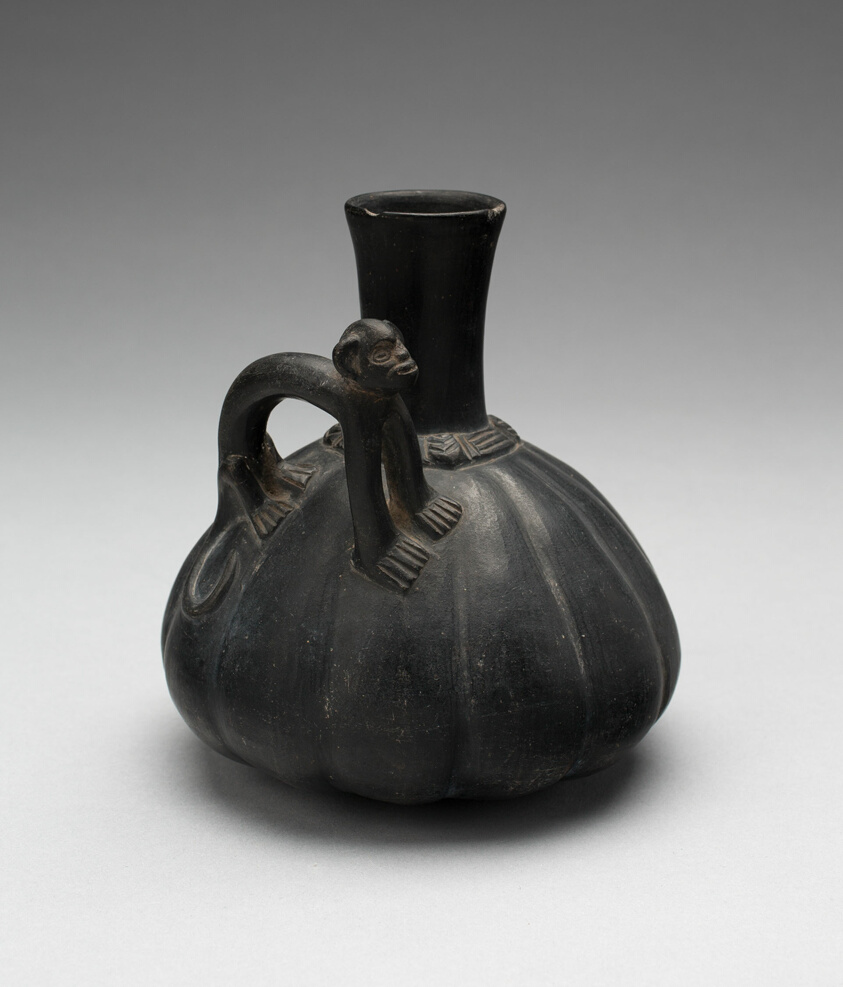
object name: Vessel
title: Gourd-Shaped Blackware Jar with Modeled Monkey Handle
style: chimú, late intermediate period, Pre-Columbian, americas, inca, Arts of the Americas, andean, andes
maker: Possibly Lambayeque or Inca-Chimu; North coast, Peru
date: 1000–1450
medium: Ceramic and pigment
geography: Peruvian North Coast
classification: earthenware; ceramics; vessel; art of the americas